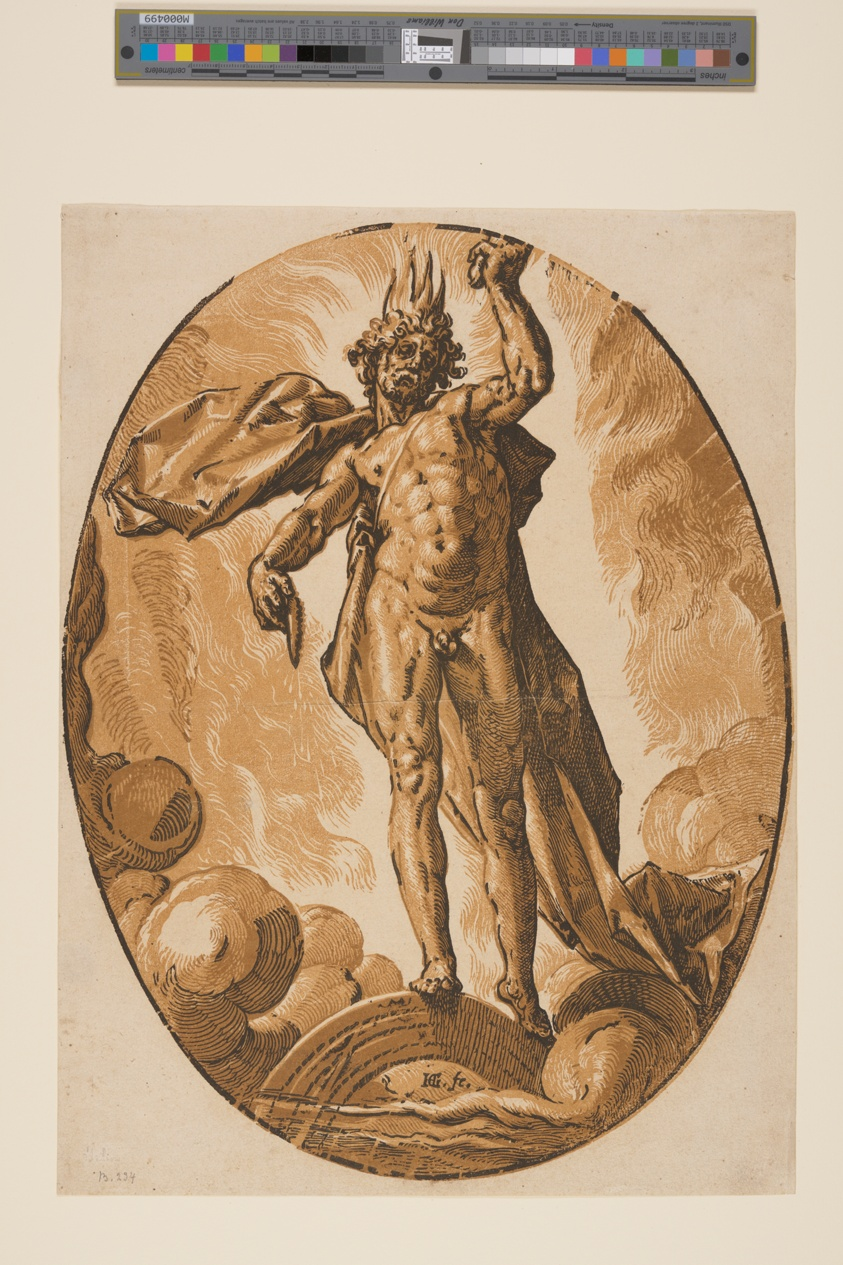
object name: Print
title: Helios, from The Deities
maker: Hendrick Goltzius (Dutch, 1558–1617)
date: 1588/90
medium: Chiaroscuro woodcut from three blocks in ochre and brown on ivory laid paper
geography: Netherlands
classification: print; paper; prints and drawing; woodcut